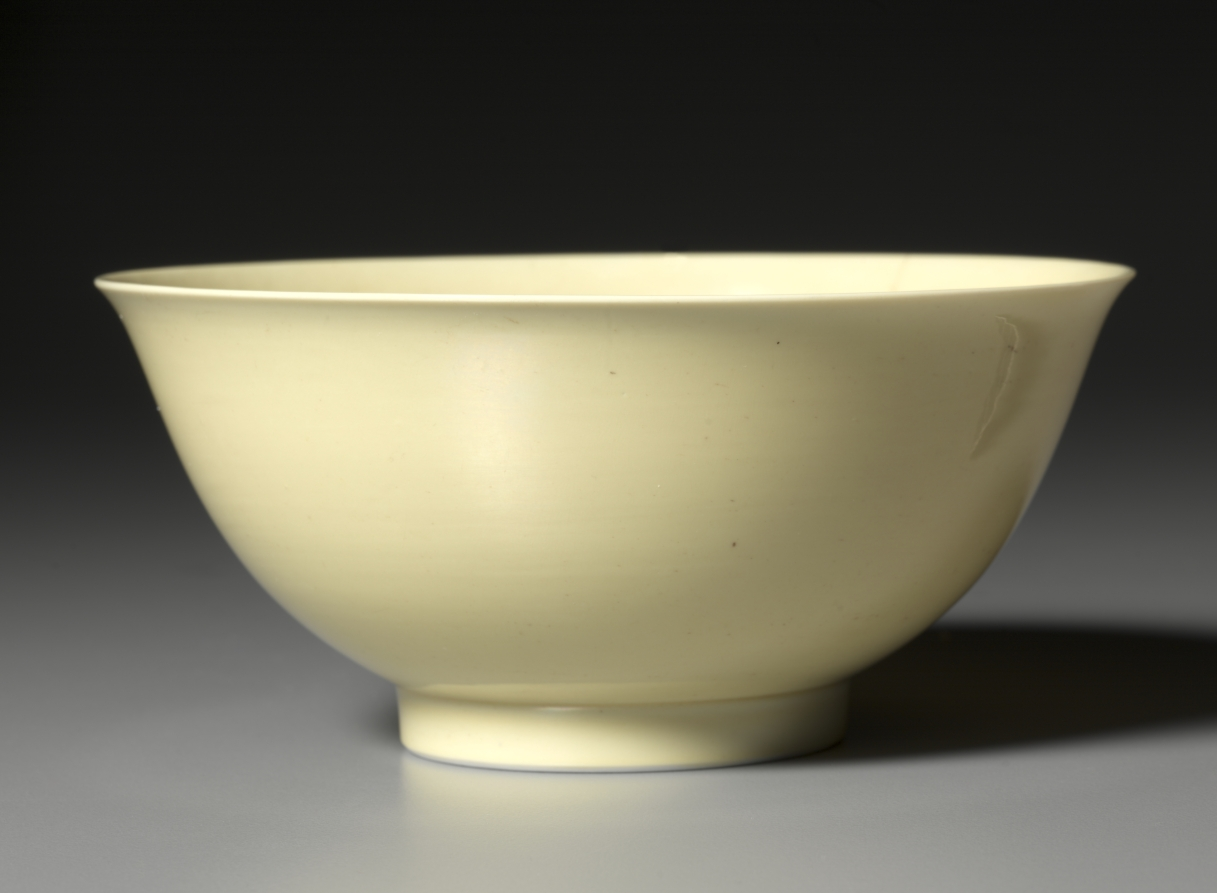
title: Bowl with Yellow Glaze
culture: China, Qing dynasty (1644-1911), Yongzheng mark and reign (1723-35)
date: 1723–1735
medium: glazed porcelain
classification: Ceramic